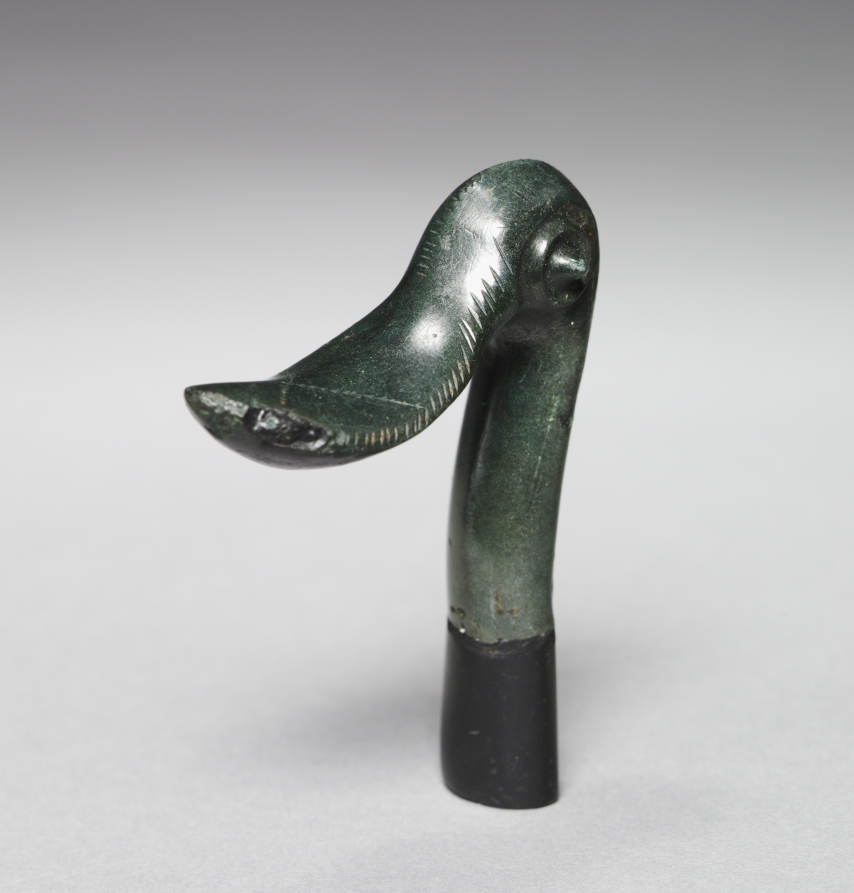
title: Duck Head Finial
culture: possibly Hungary, Bronze Age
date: c. 1400–1300 BCE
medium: bronze, cast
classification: Sculpture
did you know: A decorative object, this duck head finial likely topped a piece of furniture.